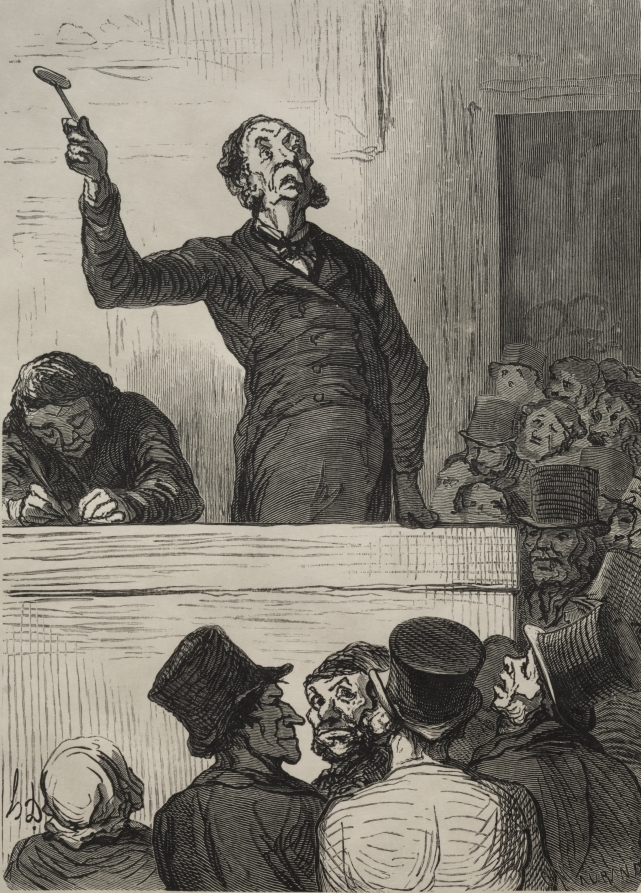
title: The Auction House: The Auctioneer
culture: France, 19th century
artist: Honoré Daumier (French, 1808–1879)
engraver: Charles Maurand (French, 1824–1904)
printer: François Louis Schmied (Swiss, 1873–1941)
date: 1863, printed 1920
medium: wood engraving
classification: Print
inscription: Lower margin, pencil 42/75 ; red stamp: FLS